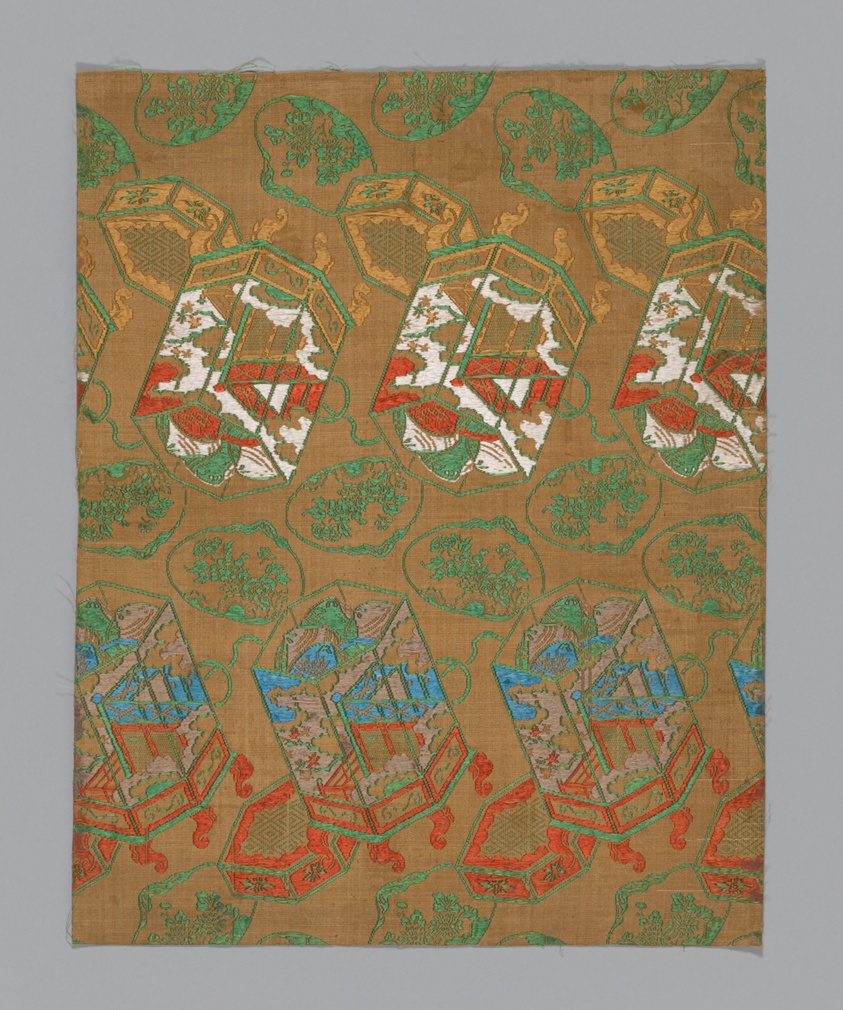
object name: Textile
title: Fragment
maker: Japan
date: 18th century, late Edo period (1789–1868)/ Meiji period (1868–1912)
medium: Plain compound cloth, silk and gilt paper; 2 strips to m.m. (kara ori)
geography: Japan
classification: textile; weaving